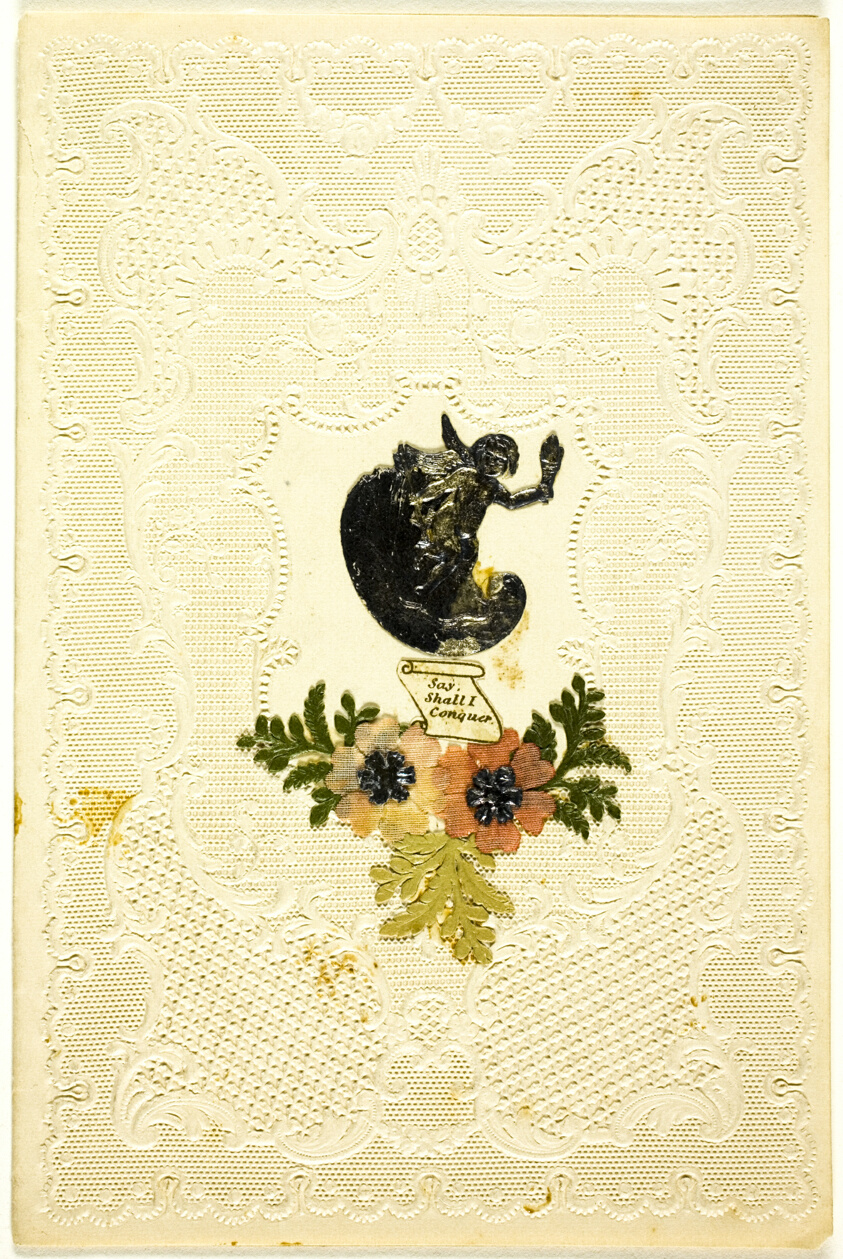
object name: Drawing and Watercolor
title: Say Shall I Conquer (valentine)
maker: Unknown Artist; English, 19th century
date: c. 1840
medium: Collaged elements on embossed ivory wove paper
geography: England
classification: valentine; prints and drawing; paper